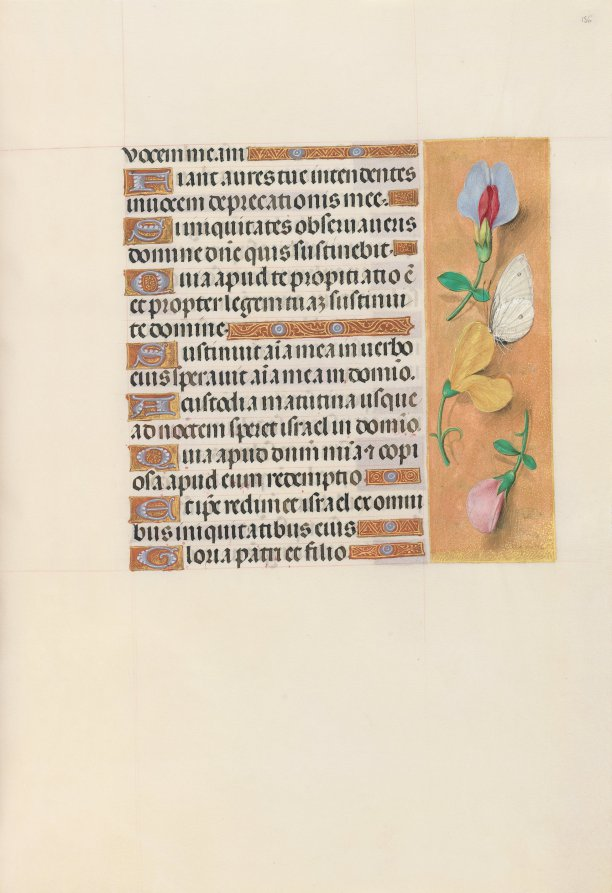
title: Hours of Queen Isabella the Catholic, Queen of Spain: Fol. 156r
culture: Flanders, Ghent and Bruges, late 15th century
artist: Master of the First Prayerbook of Maximillian (Flemish, c. 1444–1519)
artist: and Associates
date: c. 1500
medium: ink, tempera, and gold on vellum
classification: Bound Volume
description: This manuscript was illuminated by a circle of at least five highly organized manuscript painters active in the Flemish cities of Ghent and Bruges. The principal illuminator was Alexander Bening, who painted the majority of the book's miniatures. Manuscripts produced by this circle of artists are renowned for the decoration of their borders, which typically feature a rich variety of realistically-painted flowers, birds, and butterflies. This prayer book, called a book of hours, was intended not for a cleric, but for the private devotions of a lay person-in this case, Isabella the Catholic, Queen of Spain (1451-1504). Isabella's coat of arms embellishes the book's frontispiece. It is unlikely that the book was commissioned by the Queen herself; rather, she probably received it as a diplomatic gift from someone courting her patronage, perhaps Cardinal Francisco Jimenez de Cisneros. A Franciscan friar, Jimenez was dependent upon Isabella for his advancement, first to the post of Queen's confessor in 1492, and then to Archbishop of Toledo in 1495.